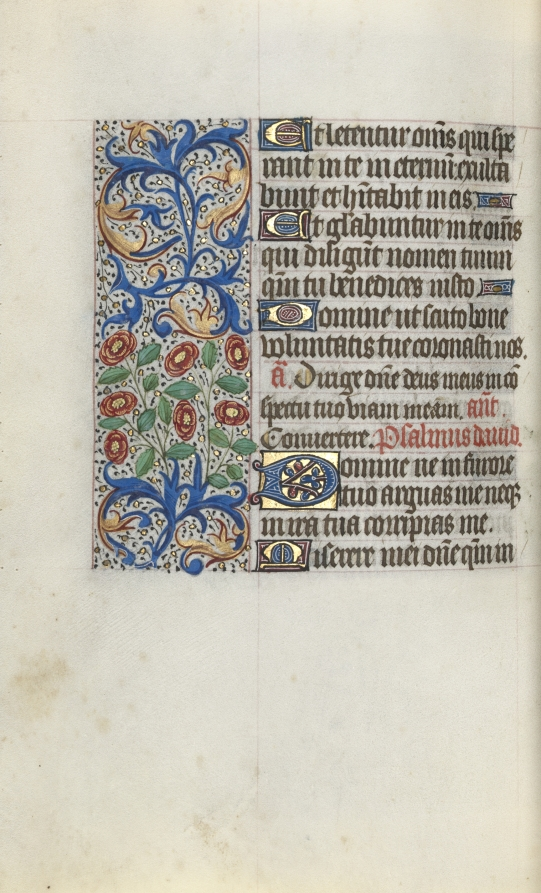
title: Book of Hours (Use of Rouen): fol. 111v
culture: France, Rouen, 15th century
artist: Master of the Geneva Latini (French, active Rouen, 1460–80)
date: c. 1470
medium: ink, tempera, and gold on vellum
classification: Bound Volume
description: In the late 1400s and early 1500s Rouen was an established and important center of book production. The city’s cathedral had a wealthy chapter that spent large sums of money to commission books and to maintain its extensive library. The stationers and booksellers would have likely been concentrated in or near the cathedral precinct. This artist, named after a manuscript now in Geneva, was Rouen’s principal illuminator during the second half of the 1400s.